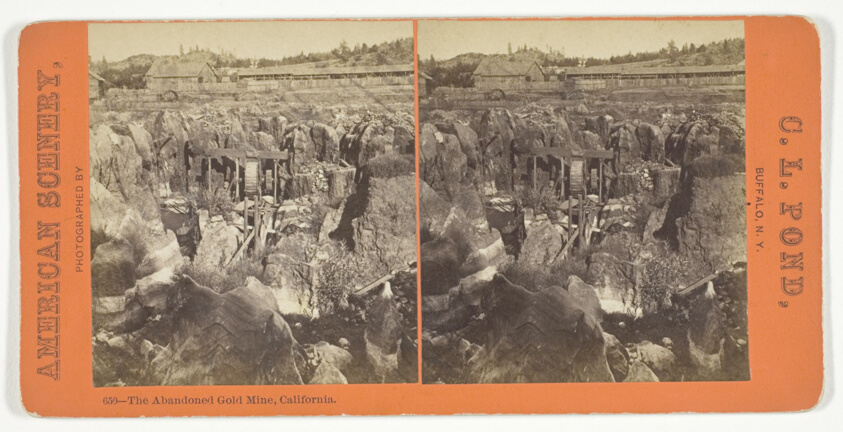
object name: Photograph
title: The Abandonded Gold Mine, California, No. 650 from the series "American Scenery"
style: 19th century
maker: C. L. Pond (American, active 1860–1890)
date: 1860/90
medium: Albumen print, stereo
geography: United States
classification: stereograph (albumen); albumen silver print; photographic process; photography; photograph